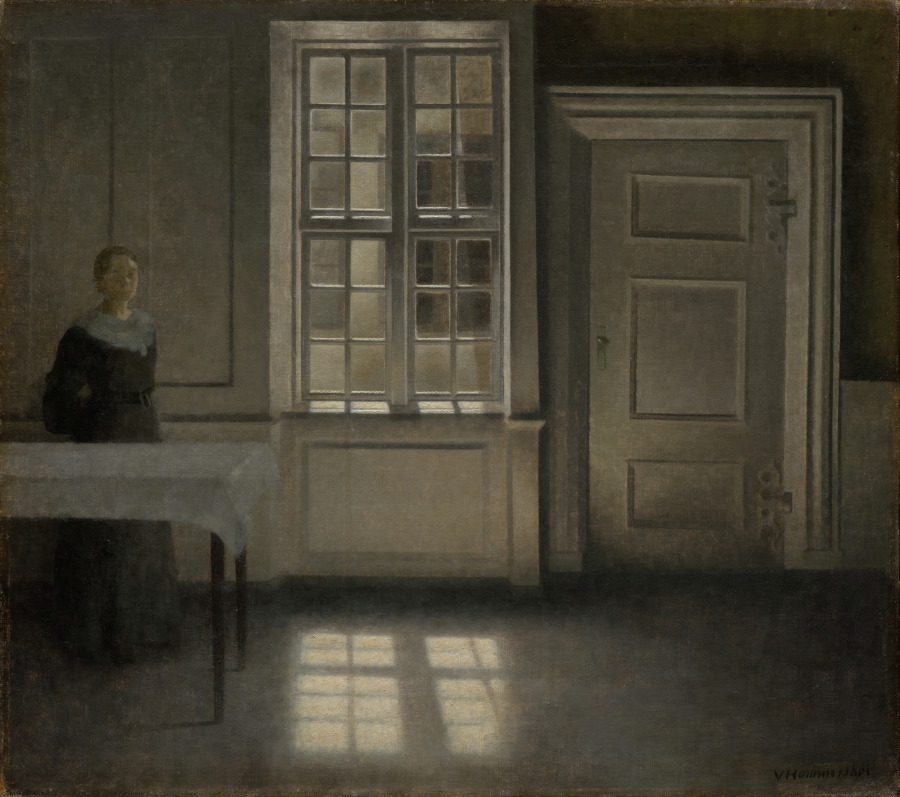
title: Strandgade, Sunshine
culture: Denmark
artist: Vilhelm Hammershøi (Danish, 1864–1916)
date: c. 1906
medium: oil on canvas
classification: Painting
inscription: Artist's signature: "V Hammershoi" (lower right), in black paint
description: One of Denmark’s most celebrated artists, Vilhelm Hammershøi was a painter of quiet spaces, mystery, and silence. Among his most memorable works are paintings of his apartment at 30 Strandgade in Copenhagen, here seen with the sun shining through a window, illuminating the floor and door to the right, while a woman stands in the shadows. The nearly empty room, muted tones, and closed door next to a window evoke a haunting mood filled with psychological complexity.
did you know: The poet Rainer Maria Rilke wrote, "Hammershøi is not one of those artists that one needs to talk about quickly. His work is long and slow and at whatever moment one comes to grips with it, one will have ample occasion to speak of what is significant and essential in art."